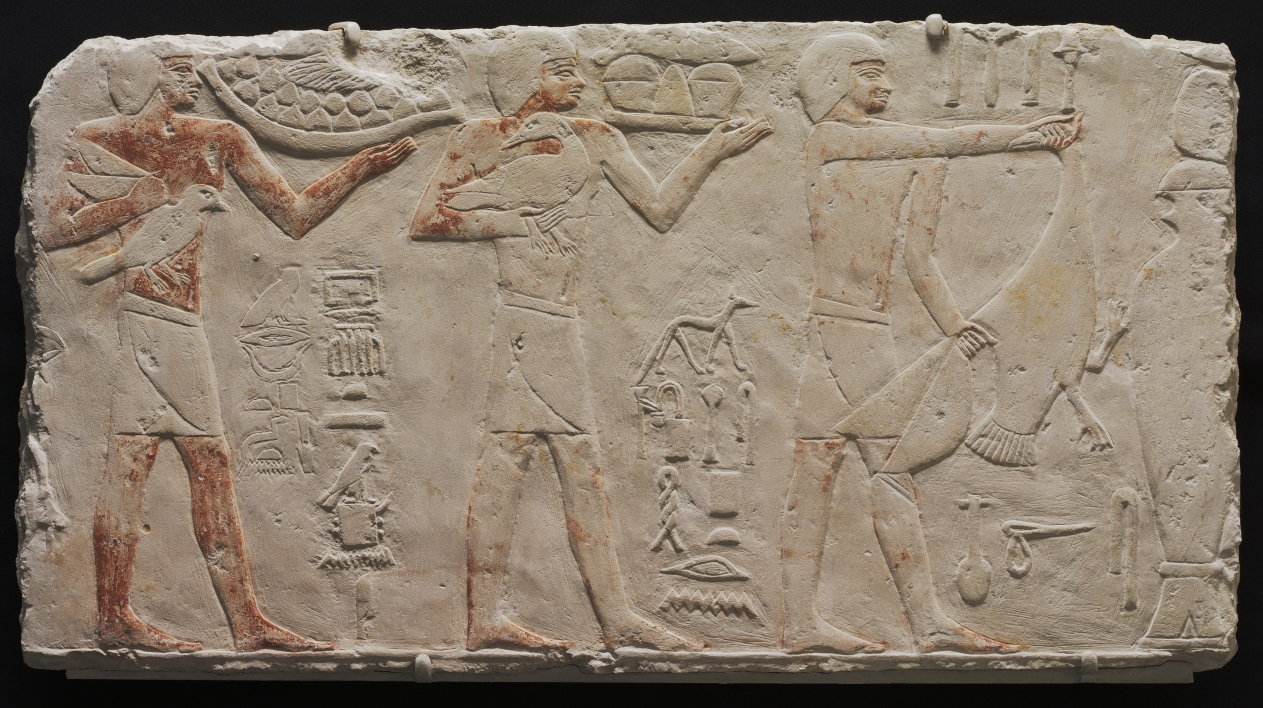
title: Relief of Three Offering Bearers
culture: Egypt, Saqqara, Old Kingdom (2647–2124 BCE), Dynasty 6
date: c. 2311–2281 BCE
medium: painted limestone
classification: Sculpture